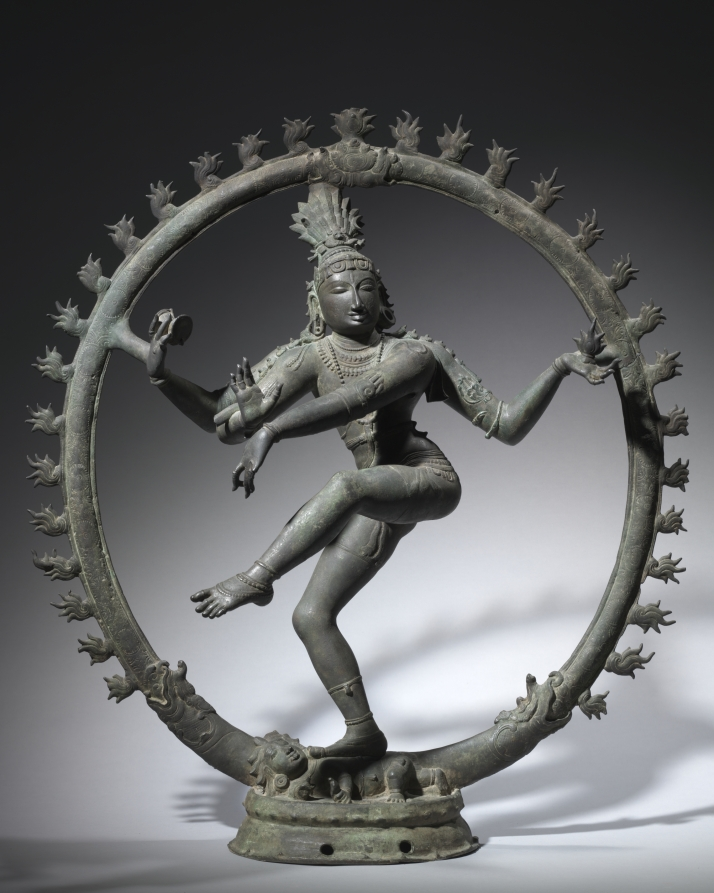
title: Nataraja, Shiva as the Lord of Dance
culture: South India, Tamil Nadu, Chola period (900-1200s)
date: 1000s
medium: Bronze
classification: Sculpture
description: One of the most celebrated sculptural forms in the history of Indian art, this elegant and dynamic figure embodies some of Hinduism’s most fundamental tenets. According to Hindu thought, time is cyclical; the world is created, maintained, preserved for a time, then destroyed, only to be created again an infinite number of times. For those Hindus who view Shiva to be the all-powerful creator divinity, he is responsible for both creation and destruction. The ring of fire and the tongue of flame he holds in his left hand refer to destruction, and the drum in his raised right hand refers to the relentless beat of time as it moves inevitably forward. His lower right hand, held up with the palm facing out, signals to his devotees not to be afraid of the impending destruction; they can be liberated from the cycles of birth and death through devotion to him, which he indicates by pointing to his upraised foot. With every step in his dance, he lands on a dwarfish figure personifying ignorance.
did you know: The trampled figure holds a serpent in his left hand and with his right points up to Shiva.